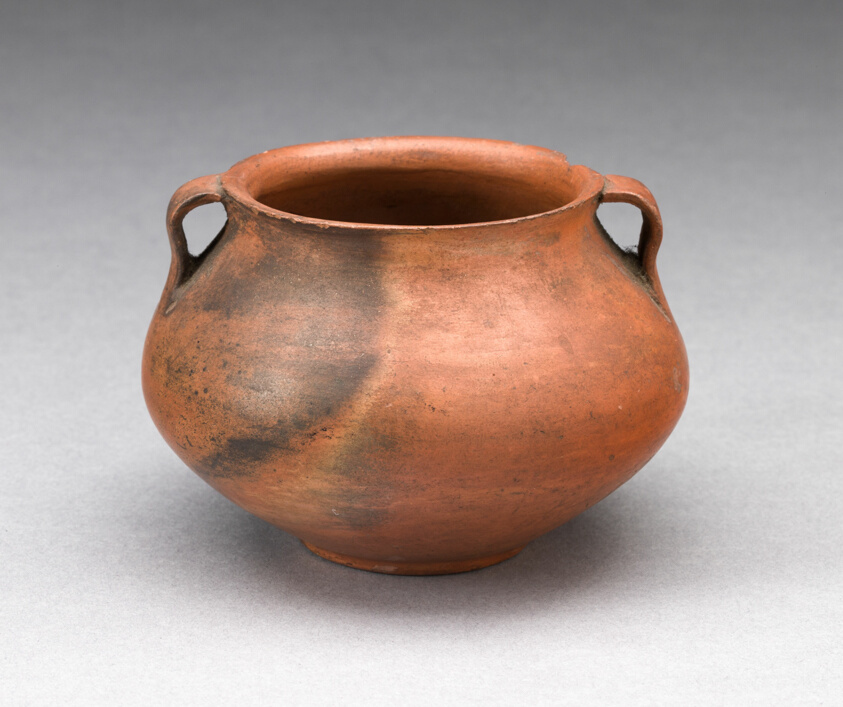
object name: Vessel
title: Miniature Two Handled Jug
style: inca, late intermediate period, Pre-Columbian, americas, Arts of the Americas, andean, andes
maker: Inca (South coast or southern highlands, Peru)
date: 1450–1532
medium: Ceramic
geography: Southern Peru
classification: earthenware; ceramics; vessel; art of the americas